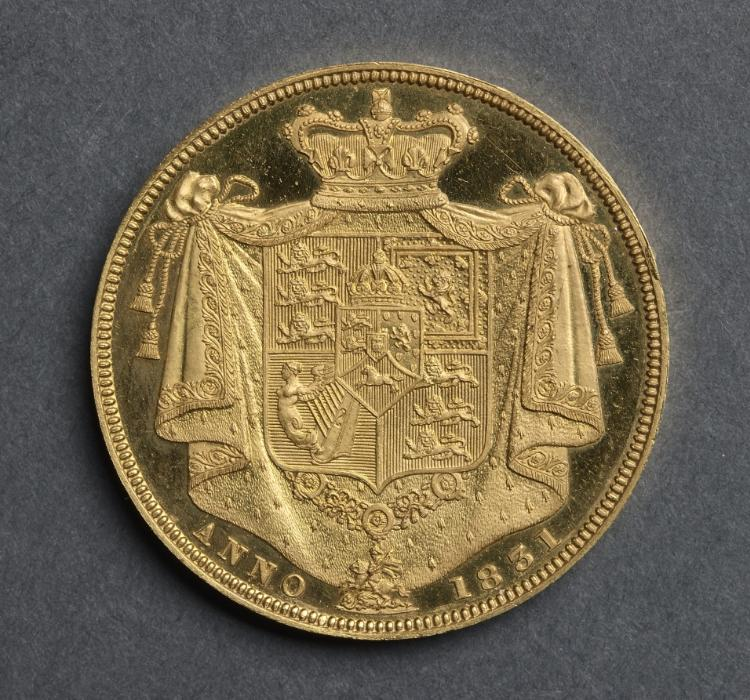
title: Two Pound Piece: Crowned and Heavily Mantled Shield of Arms (reverse)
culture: England, William IV, 1830-1837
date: 1831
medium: gold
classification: Coins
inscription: below: ANNO 1831.